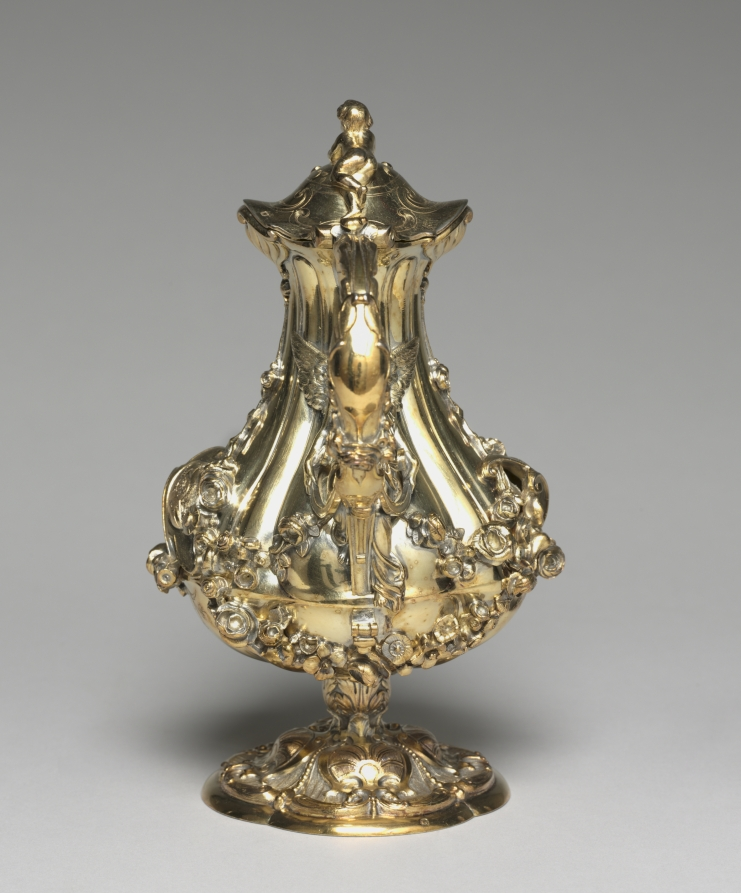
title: Covered Jug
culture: France, 19th century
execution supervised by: Jean-Valentin Morel (French, 1794–1860)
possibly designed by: Jules Dieterle (French, 1811–1889)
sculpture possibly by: Jules Klagmann (French, 1810–1867)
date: c. 1845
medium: gilded silver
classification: Silver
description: The elegance and richness of this ewer demonstrate the high level of technical mastery achieved by its maker. Morel studied under his father, a Parisian lapidary (someone who cuts, polishes, and engraves hard stones), and with Adrien Vachette, a maker of gold boxes. In 1842 he went into partnership with Charles-Edmond Duponchel, which lasted until the late 1840s, at which time he established himself in London, remaining there until 1852, when he returned to Paris. Morel frequentlyfollowed the designs of others, and it has been suggested that in the case of this pitcher his well-known contemporary, Jules Dieterle (1811-1889), may have conceived the overall form. The female figure seems to have been based on a design by the sculptor Jules Klagmann (1810-1867).